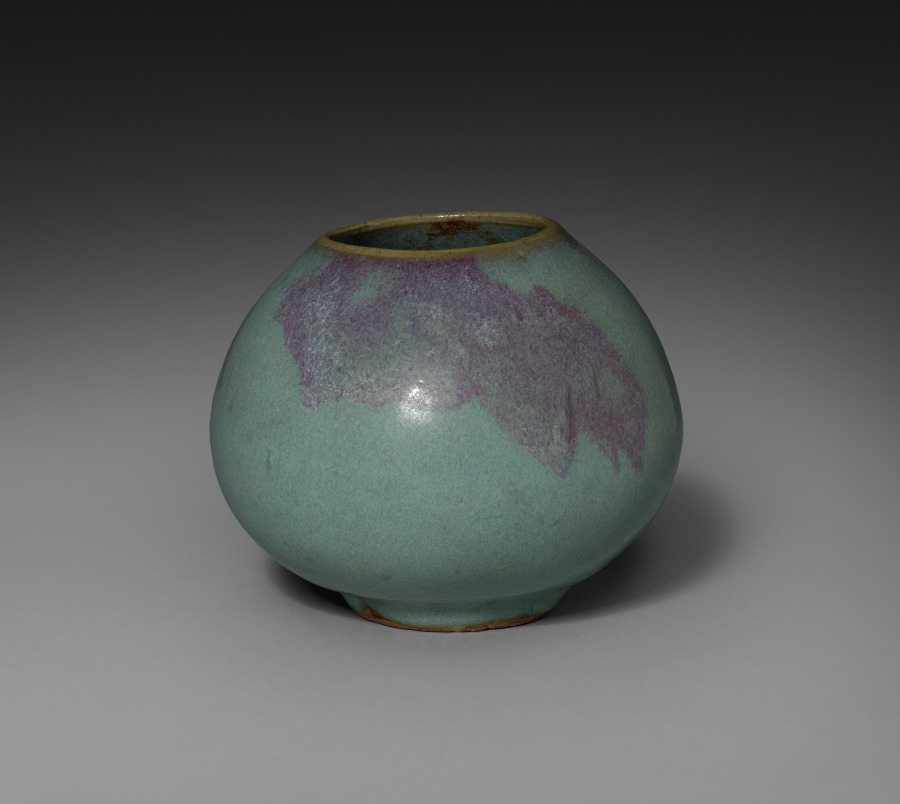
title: Jar with Cover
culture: China, Henan province, Yuxian, Northern Song dynasty (960-1127) or Jin dynasty (1115-1234)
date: 1100s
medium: porcelaneous stoneware with blue glaze and splashes of purple, Jun ware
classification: Ceramic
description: The beauty of Jun ware lies in its spectacular glaze effects, which provide immediate visual appeal. The glaze that is thickly applied onto the heavily potted body also lends the vessel a sense of volume. As shown here, its glaze colors range from soft milky-blue to rose-purple. The purple suffusions are created by splashing or brushing copper-rich pigments onto the glaze before firing. The merging of purple splashes with opalescent blue glaze displays rich tonal variations, resembling purplish glows at sunset.